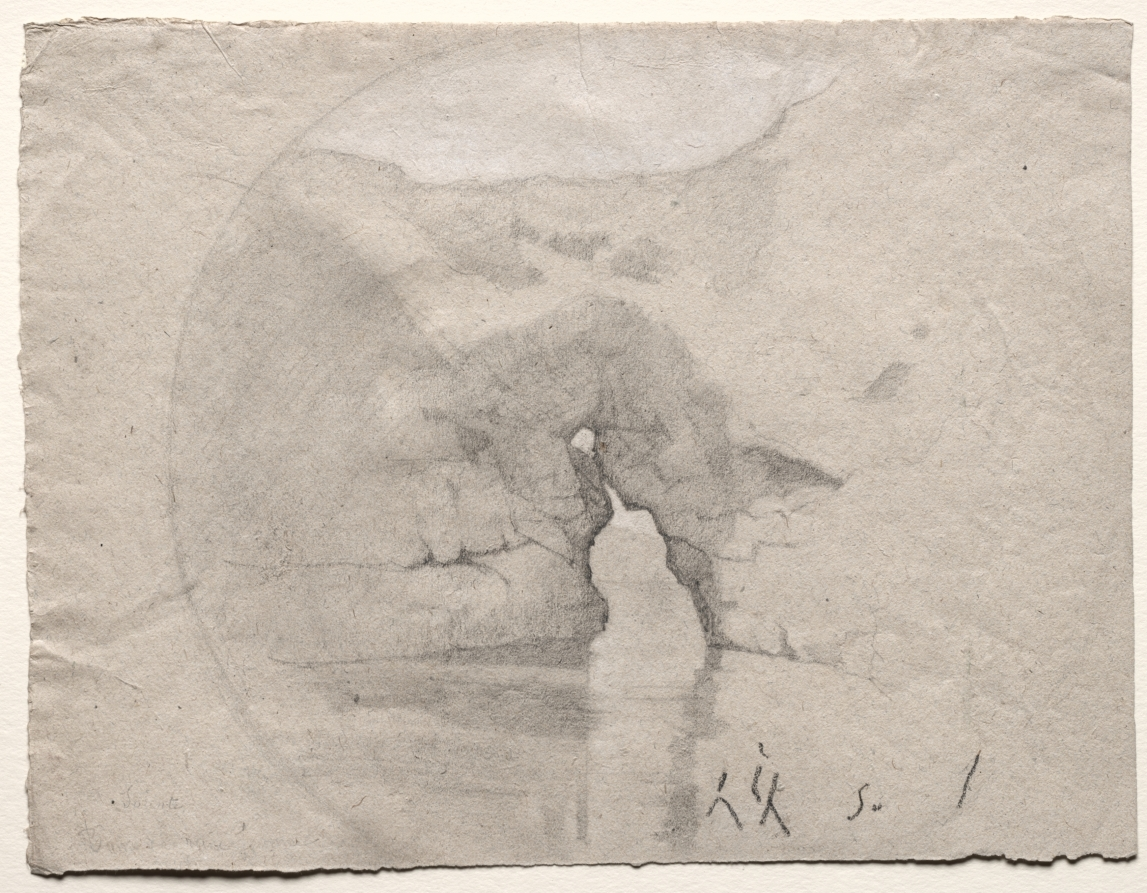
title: Sorrente, Bains de la Reine Jeanne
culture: France, 19th century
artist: Henri Joseph Harpignies (French, 1819–1916)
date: 1848–1865?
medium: black and white chalk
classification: Drawing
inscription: $675